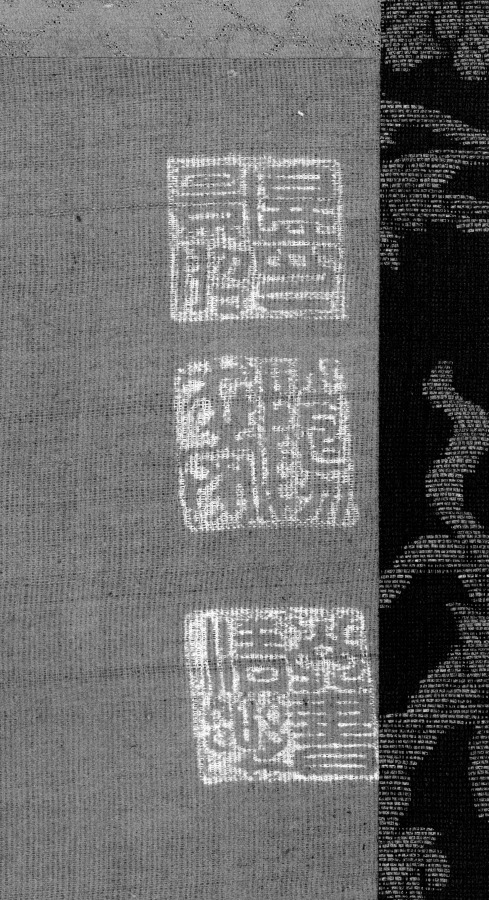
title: A Hundred Birds and the Three Friends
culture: China, Ming dynasty (1368–1644)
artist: Bian Wenjin (Chinese, about 1354–1428)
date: 1400–1425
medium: hanging scroll; ink and color on silk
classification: Painting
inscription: Artist's three seals: Pien yin Ching-chao; Sha-yang shih-chia; Ch'in shu ch'ing-lo.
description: In this hanging scroll birds rest and frolic among pines, bamboo, and flowering plum, plants known as “the three friends.” Due to their endurance in winter, they symbolize perseverance and friendship in adverse times. The naturalistic depiction of the birds refers to the bird-and-flower painting tradition of the Art Academy of the Song dynasty. The painter Bian Wenjin served at the court of the Ming dynasty Yongle Emperor (reigned 1402–24). This painting may have been hung in a private studio or palace hall on appropriate occasions.